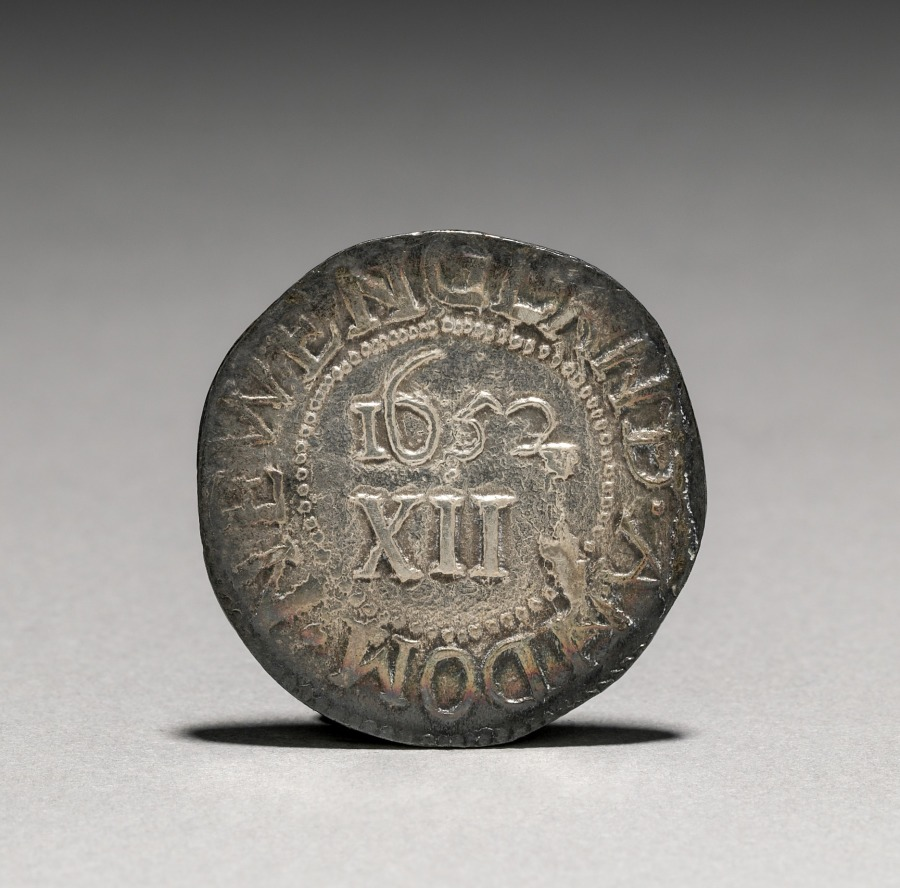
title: Oak Tree Shilling (reverse)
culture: America, Massachusetts, Boston, 17th century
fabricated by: John Hull (American, 1624–1683)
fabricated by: Robert Sanderson (American, 1609–1693)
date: 1652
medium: silver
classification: Coins